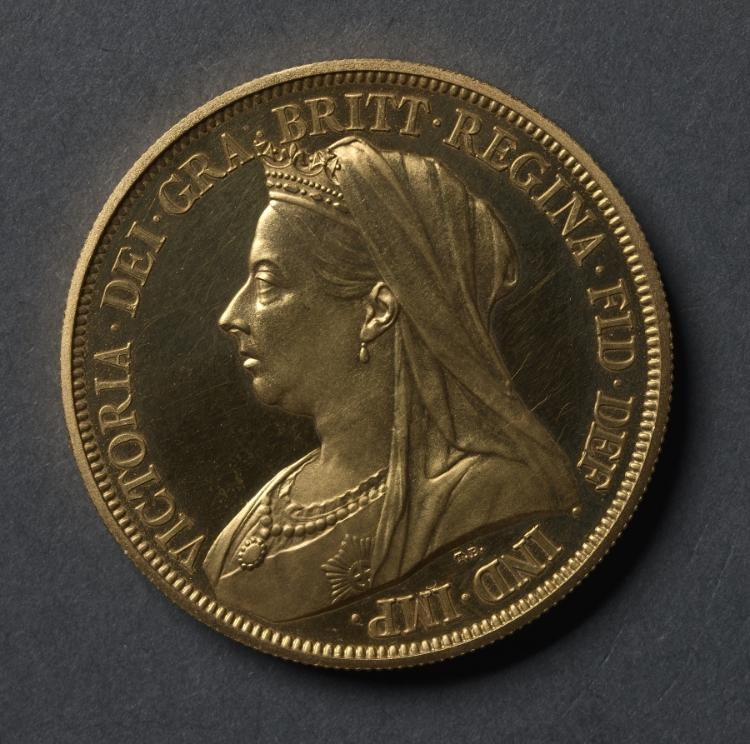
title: Five Pound Piece: Portrait of Queen Victoria (obverse)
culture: England, Victoria, 1837-1901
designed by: Thomas Brock (British, 1847–1922)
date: 1893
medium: gold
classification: Coins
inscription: VICTORIA . DEI . GRA . BRITT . REGINA . FID . DEF . IND . IMP .